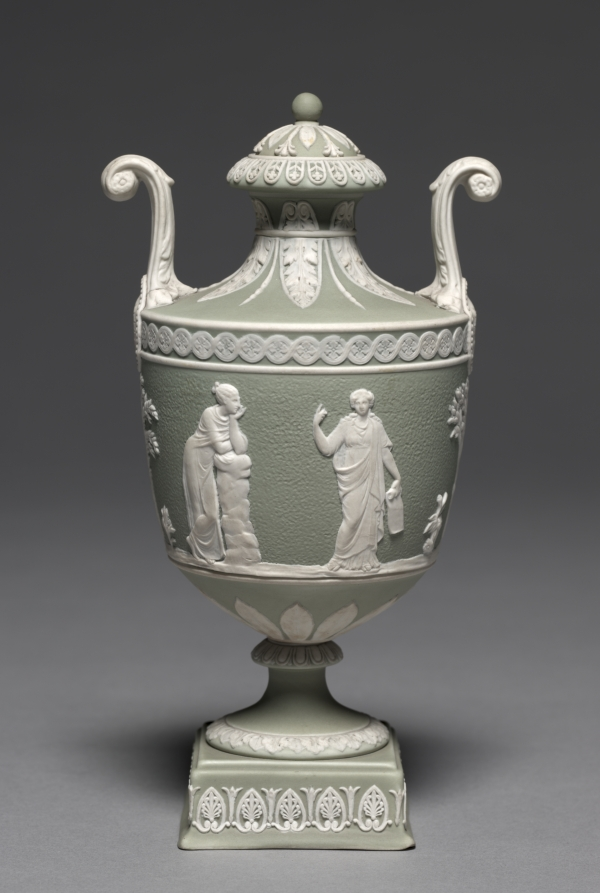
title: Cover for an Urn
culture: England, Staffordshire, late 18th-early 19th Century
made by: Wedgwood Factory (British)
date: c. 1800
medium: jasper ware with relief decoration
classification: Ceramic